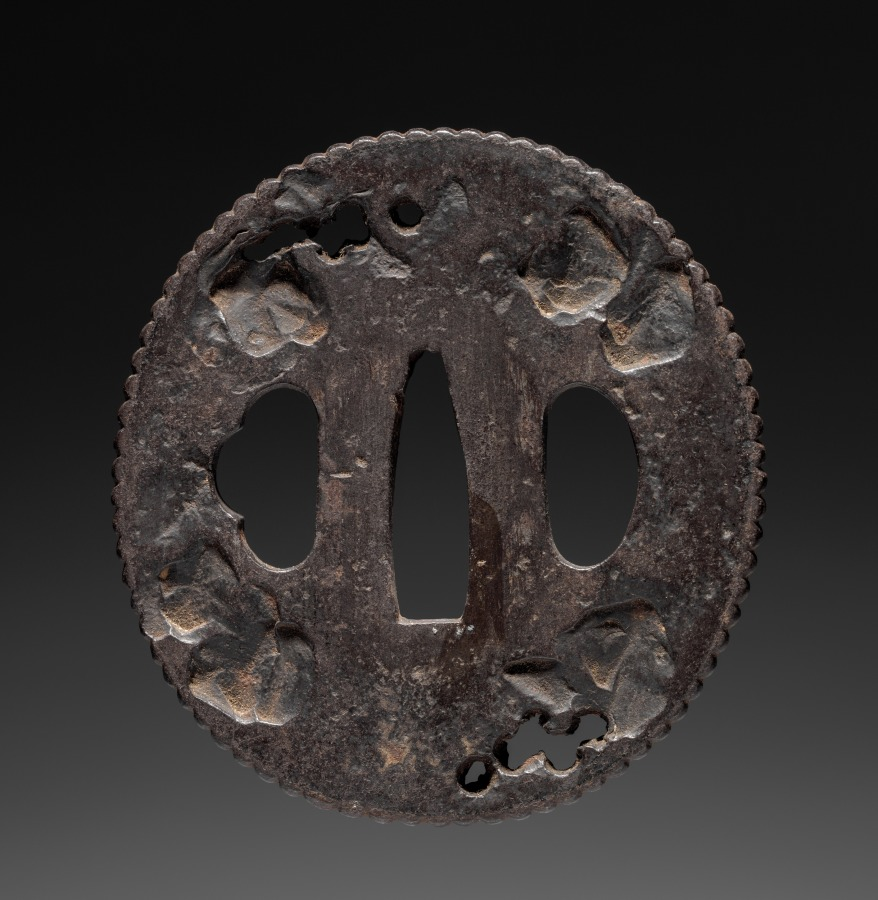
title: Sword Guard (Tsuba)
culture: Japan, possibly Edo period (1615-1868)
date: c. 1615–1868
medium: steel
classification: Arms and Armor